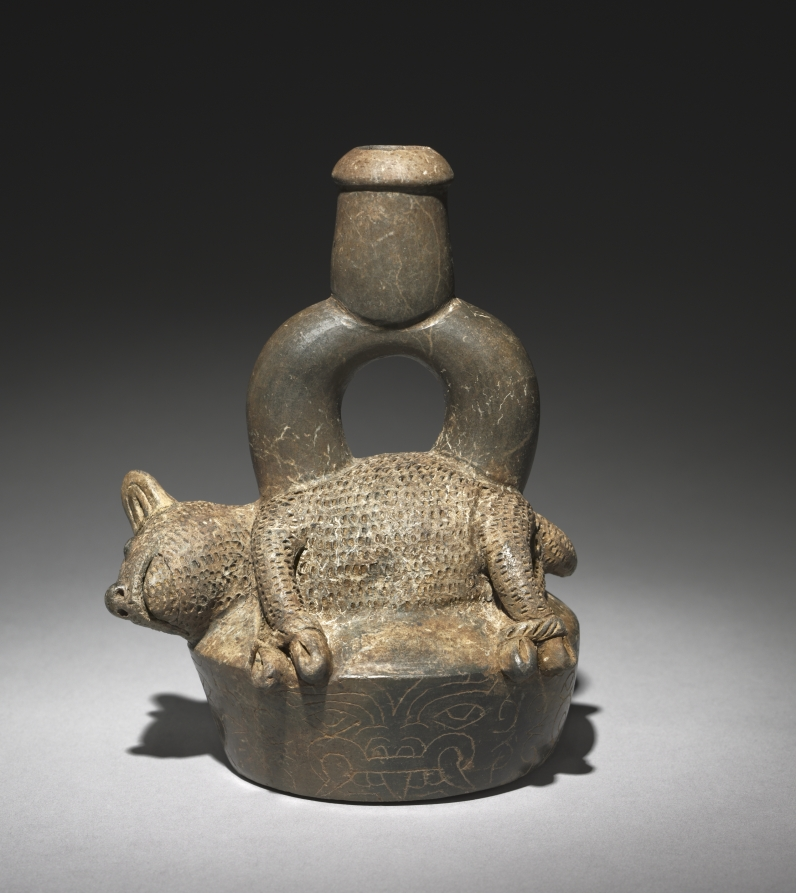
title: Vessel with Pudu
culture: Central Andes, North Coast, Chongoyape, Formative period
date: 500–200 BCE (thermoluminescence date, 1190–90 BCE)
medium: ceramic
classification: Ceramic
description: This bound pudu—a small reddish deer indigenous to the Andes—lies atop a chamber with fanged supernatural heads incised on the sides. The animal may represent a sacrificial offering.